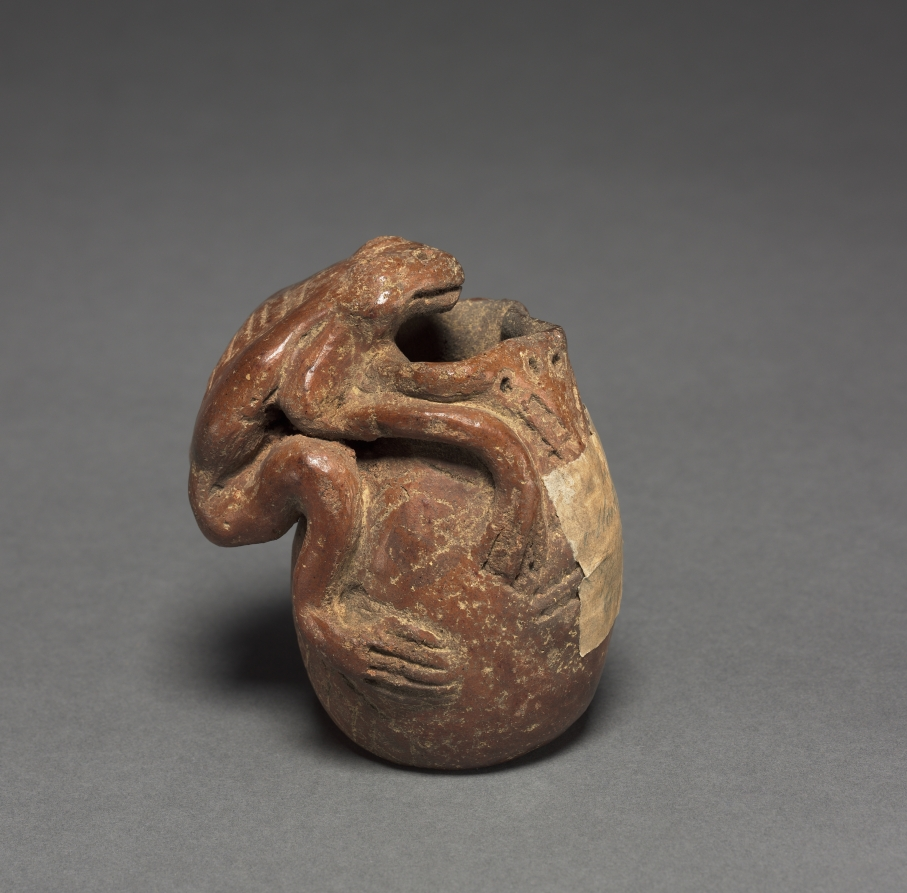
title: Jar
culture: Colombia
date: before 1921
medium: red ware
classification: Ceramic